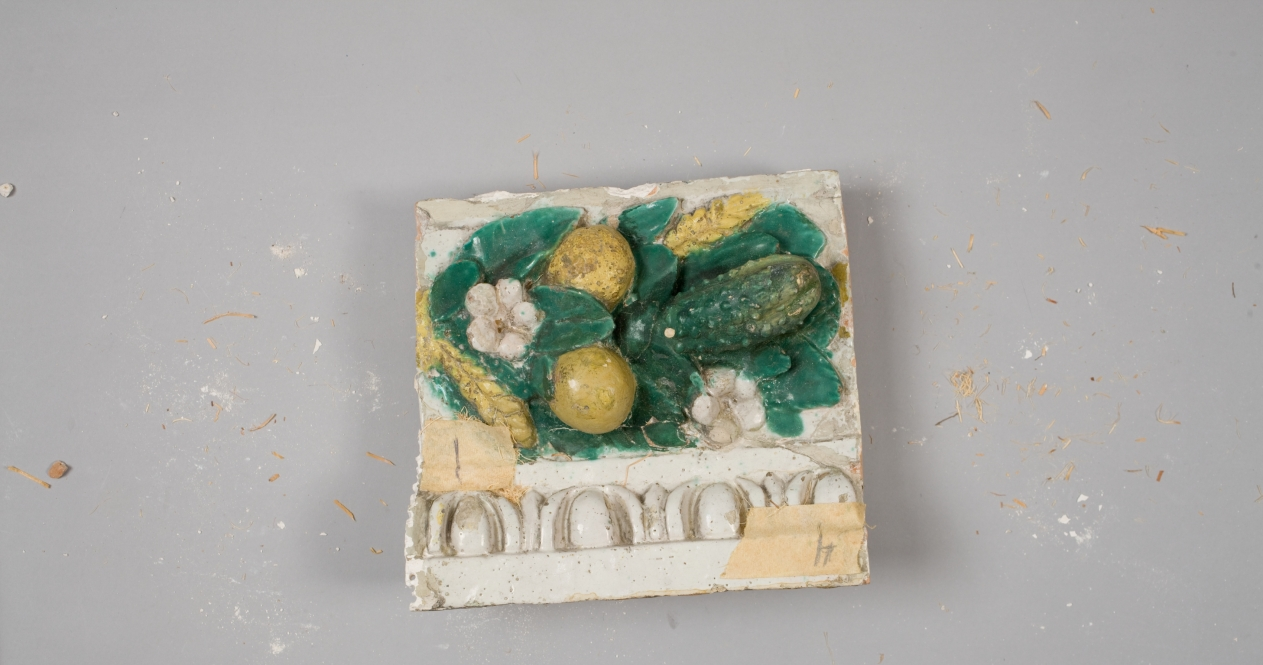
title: Fragment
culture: Italy, Florence, 16th century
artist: Benedetto Buglioni (Italian, 1461–1521)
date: c. 1900–1910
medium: glazed terracotta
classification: Sculpture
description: The Madonna sits upon a throne with the Christ Child standing on her knee. He is steadied by his mother, turning delicately to grasp the Virgin's robe for support. On the left is St. Francis, identified by his stigmata. On the right, St. Anthony Abbot is identified by his monk's robe and T-shaped walking stick. The brown robes of the saints, the purple of the Virgin's tunic (a shade characteristic of the artist), and the flesh tones of the figures contrast strongly against the bright blue background. In the semicircular sky behind the figures, three winged cherub heads emerge, representing a host of angels. The inclusion of St. Francis in this altarpiece honors the saint, suggesting that the altarpiece may have been originally built into the wall of a Franciscan institution in Tuscany. Two shields bearing the Borgherini family crest appear in the lower portion of the altarpiece's border, further suggesting that the chapel for which this altarpiece was made was likely owned or endowed by the family. Glazed terracotta is both durable and decorative and the gleaming white of this piece would have stood out in the darkness of a church. The medium was made popular by Renaissance artist Luca della Robbia and came into fashion as a substitute for expensive carved marble. A rounded arch frame embellished with fruit and flower garlands as well as egg-and-dart and cord moldings accompanied the work when it was acquired, but was later determined not to be original and removed. Buglioni's work bears the influence of the della Robbias, particularly in the simple color scheme. Buglioni likely worked in the studio of Luca's nephew, Andrea, where he would have learned the technique of glazing terracotta.